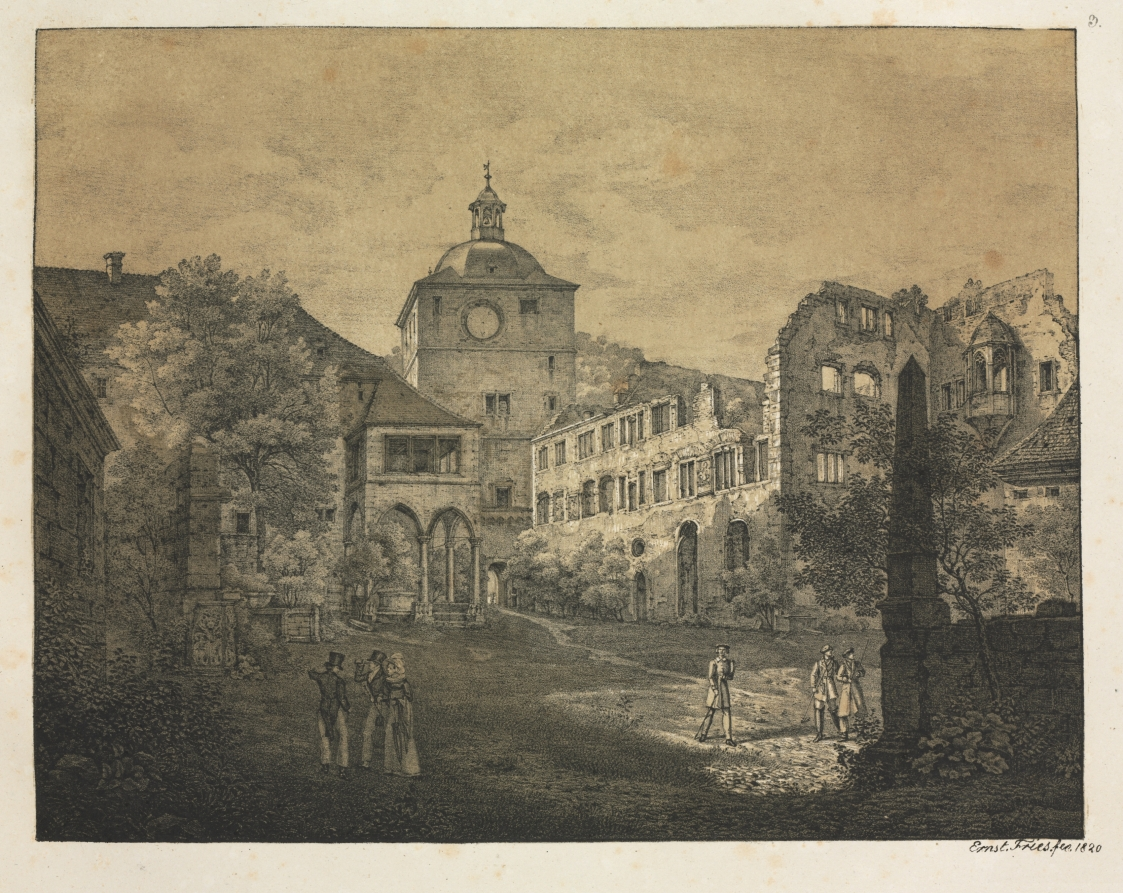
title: Six Views of Heidelberg Castle: Castle Terrace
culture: Germany, 19th century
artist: Ernst Fries (German, 1801–1833)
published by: Mohr & Winter, Heidelberg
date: 1820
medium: lithograph printed in black and two tint stones: medium ochre overall and dark ochre/warm grey selectively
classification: Print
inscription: Inscribed in graphite upper right: 4; lower right margin: Der Alten von Schloss zu Heidelberg